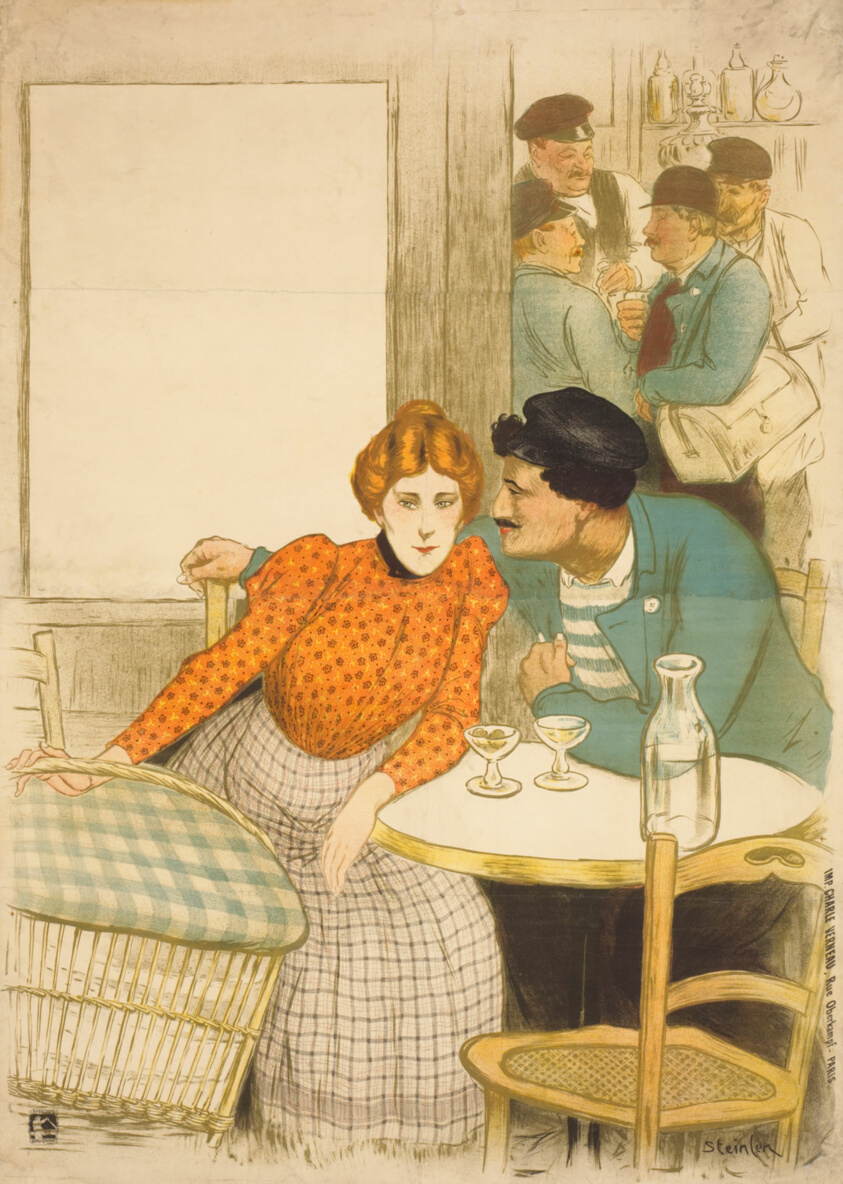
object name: Print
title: L'Assommoir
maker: Théophile-Alexandre Steinlen; French, born Switzerland, 1859-1923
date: 1900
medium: Lithograph on paper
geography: France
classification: lithograph; print; prints and drawing